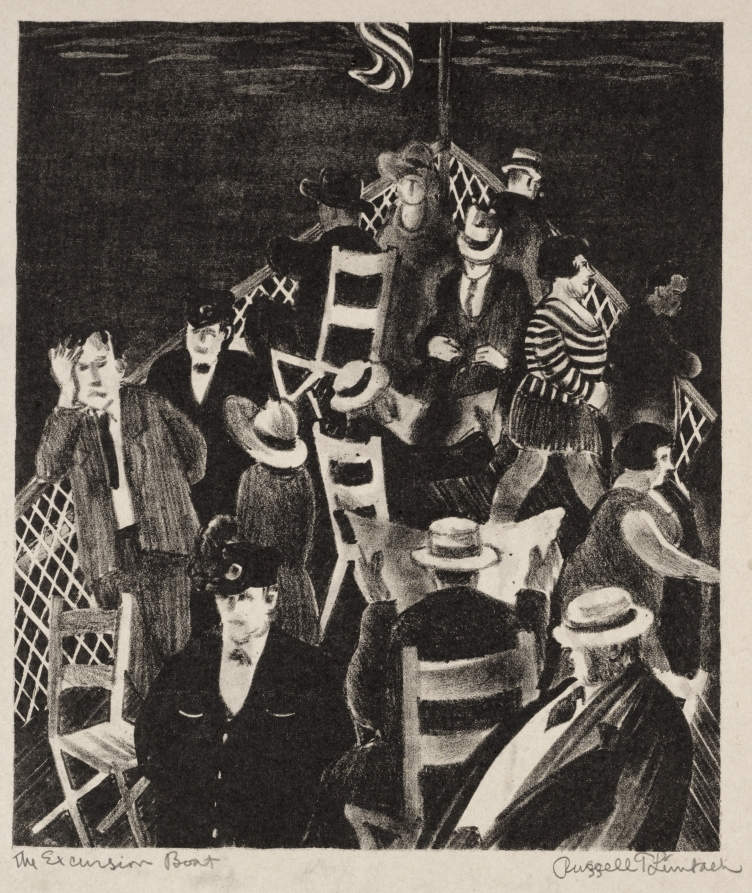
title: The Excursion Boat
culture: America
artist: Russell T. Limbach (American, 1904–1971)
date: c. 1928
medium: lithograph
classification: Print